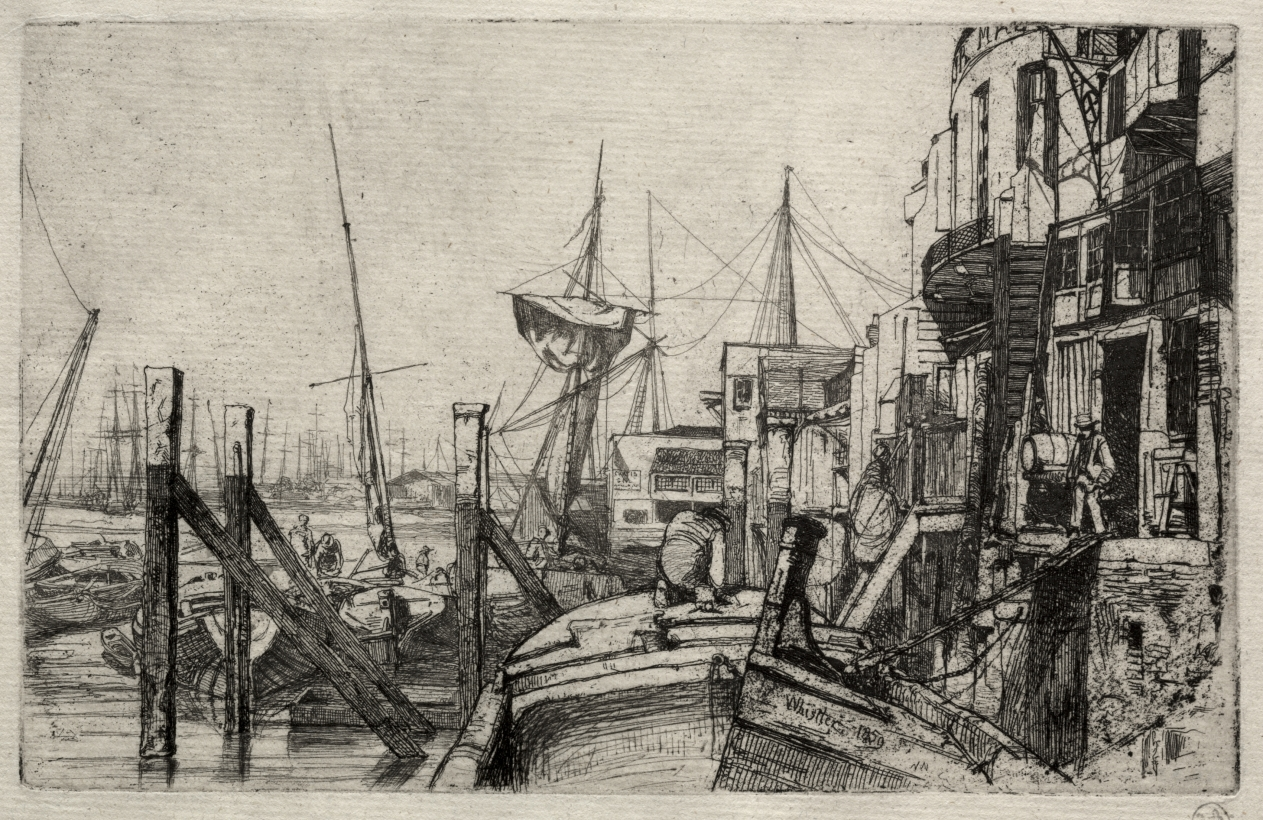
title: The Limehouse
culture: America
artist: James McNeill Whistler (American, 1834–1903)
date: 1871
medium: etching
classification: Print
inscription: signed lower center on plate: Whistler 1859